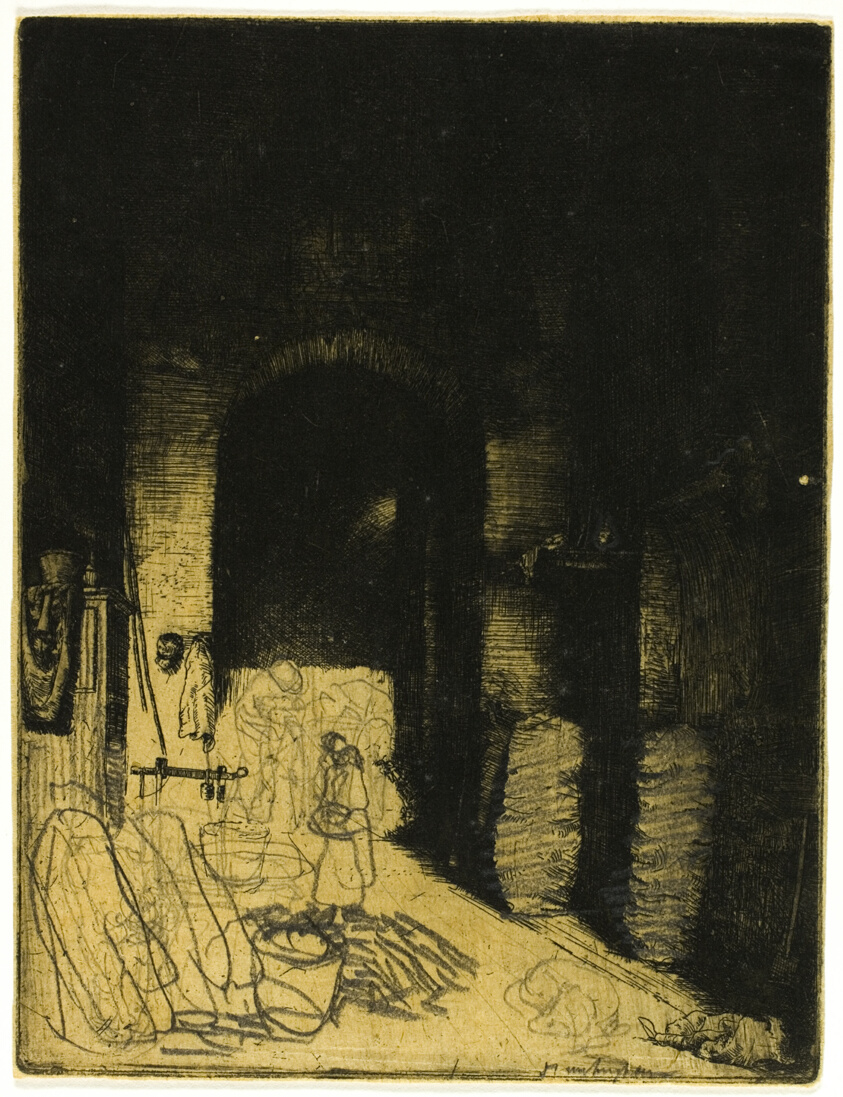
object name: Print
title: Interior of Charcoal Shop, Florence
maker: Donald Shaw MacLaughlan (American, born Canada, 1876-1938)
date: 1905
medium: Etching in black on cream laid paper with additions in graphite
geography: United States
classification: etching; print; prints and drawing